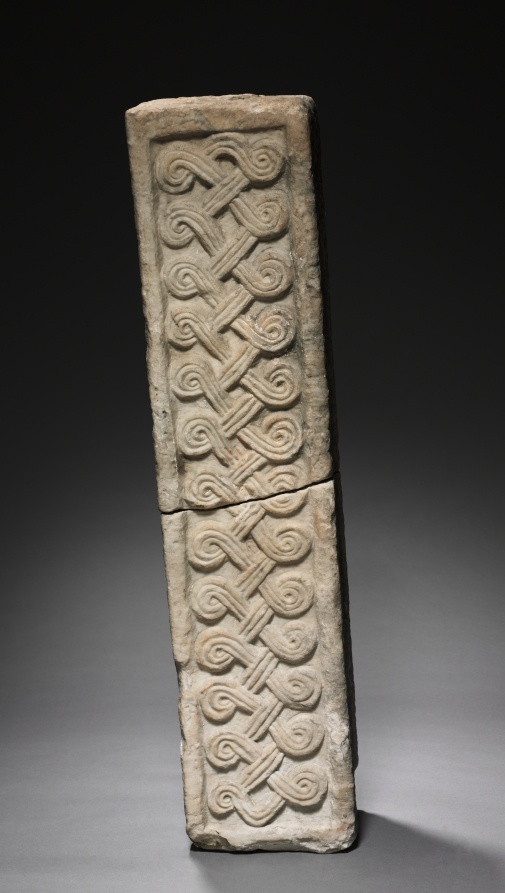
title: Transenna Post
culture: Lombardic, Italy, Rome, Migration period, 8th-9th Century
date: 700s-800s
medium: marble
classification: Sculpture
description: In Christian architecture a transenna is an openwork screen of stone or metal enclosing a shrine. These transenna elements were found in Rome; the posts were said to have been excavated on the Coelian Hill and may have originally formed part of the transenna of the Church of San Saba. The Lombards were an ancient Germanic-speaking tribe that settled in Italy after 568. Their artistic tradition was originally centered on small objects of personal adornment like buckles and brooches. After occupying Italy, the Lombards found themselves in contact with large-scale sculpture of classical and early Christian origin that, by the end of the 700s, they had learned to adopt and imitate, as seen here.